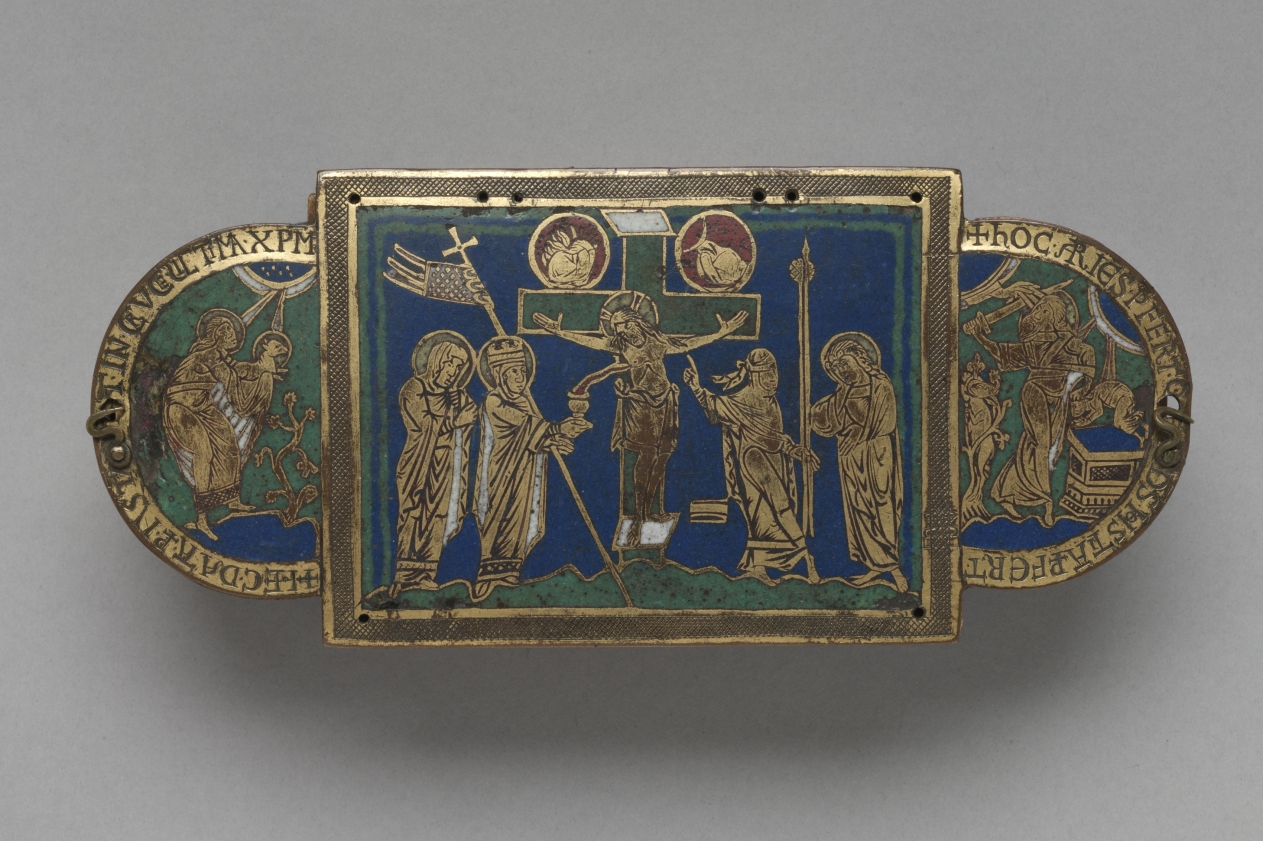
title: Pyx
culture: Germany, Lower Saxony, Hildesheim?, Romanesque period, enamels: 12th century; wood core: 19th century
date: c. 1170–1180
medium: gilded copper, champlevé and cloisonné enamel, wood core (modern)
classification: Enamel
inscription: + H[A]EC DATA P[ER] IVSTV[M] […]AT IN CRVCE VICTIMA CHR[ISTV]M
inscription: + HOC ARIES P(RE)FERT Q[VO]D […] D[EV]S HOSTIA P[ER]FERT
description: The image of Christ’s crucifixion dominates this enameled box. Personifications of the Christian church, the Jewish faith, and the Virgin and Saint John flank the cross. Two Old Testament scenes--Abel’s sacrifice of sheep and Abraham’s sacrifice of Isaac--appear on either side. The box once served as a pyx, a container for the consecrated host, itself a symbol of Christ’s sacrifice.